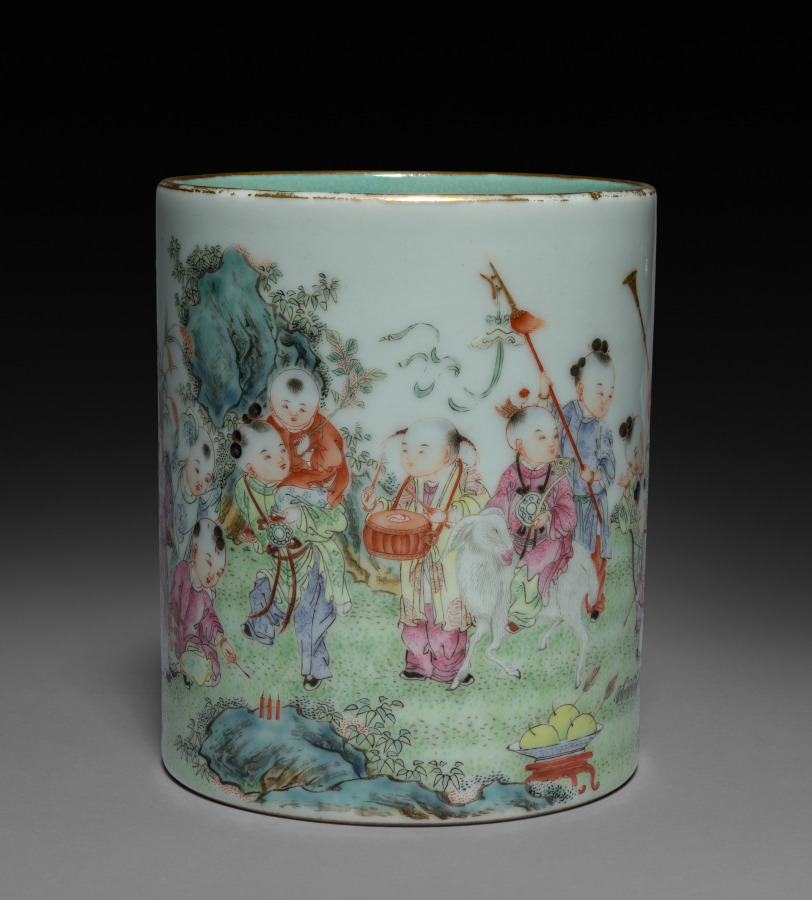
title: Cylindrical Brushholder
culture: China, Qing dynasty (1644–1911), Qianlong reign (1736–95)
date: 1736–95 or later, mid-1800s?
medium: porcelain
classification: Ceramic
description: The brush holder shows children celebrating seasonal festivals, pursuing games, and masquerading as adults with attributes that suggest their future careers in the military or civil service. Three boys play in the shadow of a garden rock with cricket cages; others parade a boy on a goat who wears the headgear of a scholar who passed first in the state examinations. Left to the goat kneels a boy who is about to ignite fire crackers lined up on a stone, a custom to celebrate the New Year. Moreover, the combinations of motifs form puns that express auspicious wishes.